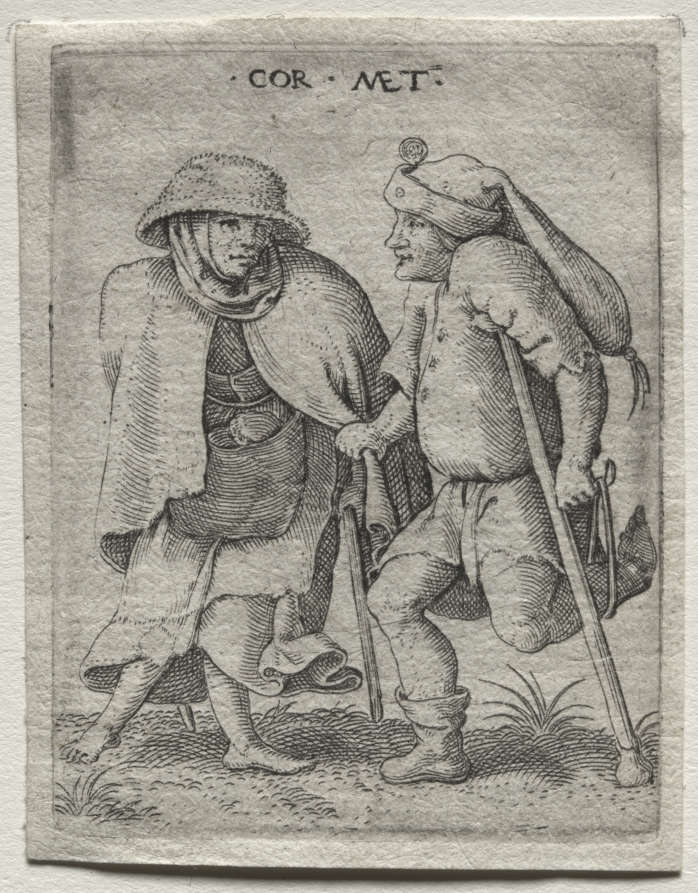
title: Dancing Cripples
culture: Flanders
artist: Cornelis Massys (Flemish, 1510/11–1556/57)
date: 1538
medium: engraving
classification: Print